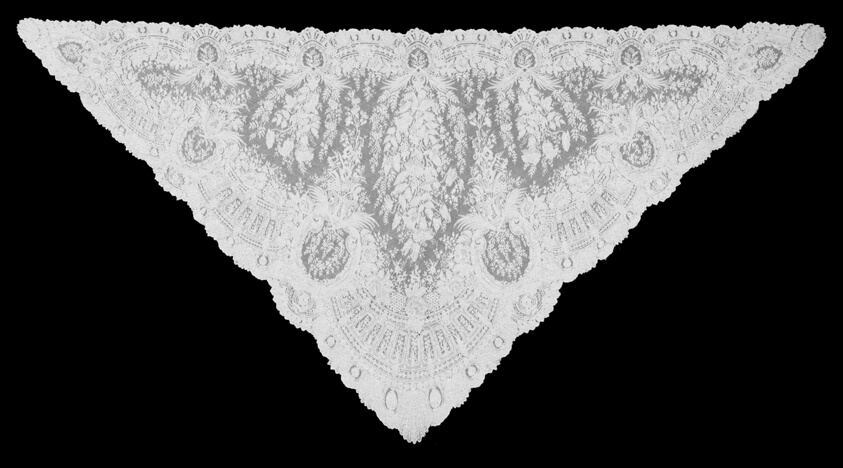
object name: Costume and Accessories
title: Shawl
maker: England or France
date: 1860s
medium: Silk and mohair, Pusher machine lace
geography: England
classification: textile; lace - machine; costume